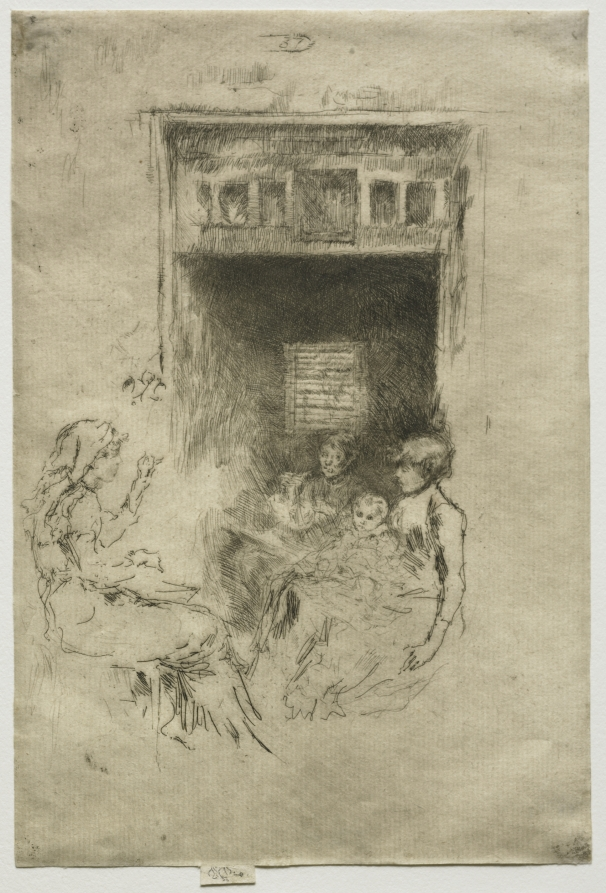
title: Bead Stringers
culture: America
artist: James McNeill Whistler (American, 1834–1903)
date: 1880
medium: etching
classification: Print